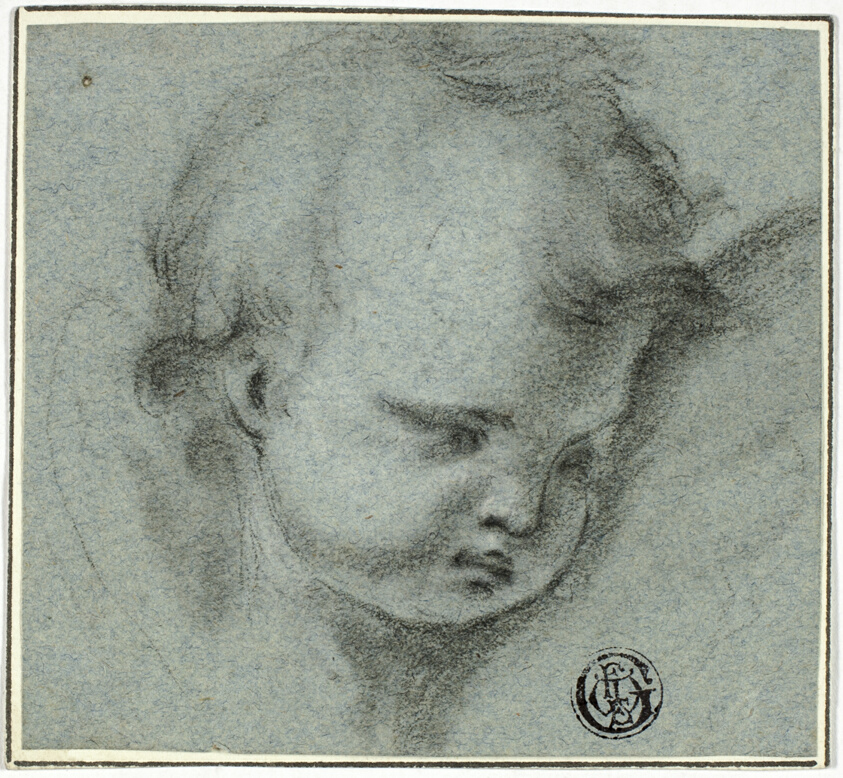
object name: Drawing and Watercolor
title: Head of Putto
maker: Unknown Artist; Italian, 1600-1699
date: 1600-1699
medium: Black chalk on blue laid paper tipped onto ivory wove paper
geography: Italy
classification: charcoal; drawings (visual works); prints and drawing